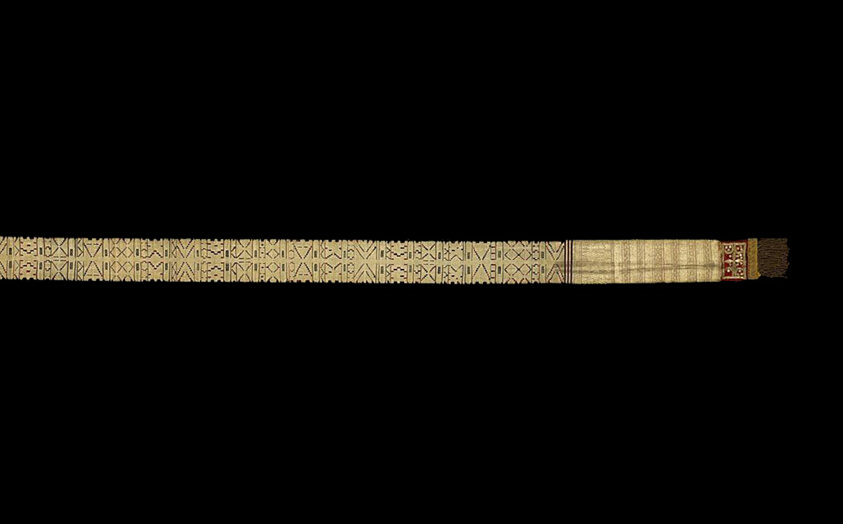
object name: Religious/Ritual Object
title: Ceremonial Waist Sash (ikak pinggang)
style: indonesian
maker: Minangkabau people; Indonesia, West Sumatra, Solok village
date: 19th century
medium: Cotton, silk, and gilt-metal-strip-wrapped cotton; in bands of plain weave, plain weave with supplementary patterning wefts and slit and dovetailed tapestry weave; ends of wool, plain weave; fulled; edged with tape of cotton and gilt-metal-strip-wrapped cotton and gilt-metal strip, plain weave with supplementary wefts; underlaid with tape of cotton, plain weave with extended paired weft and silvered-metal coil fringe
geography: Sumatra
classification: textile; weaving; ritual objects